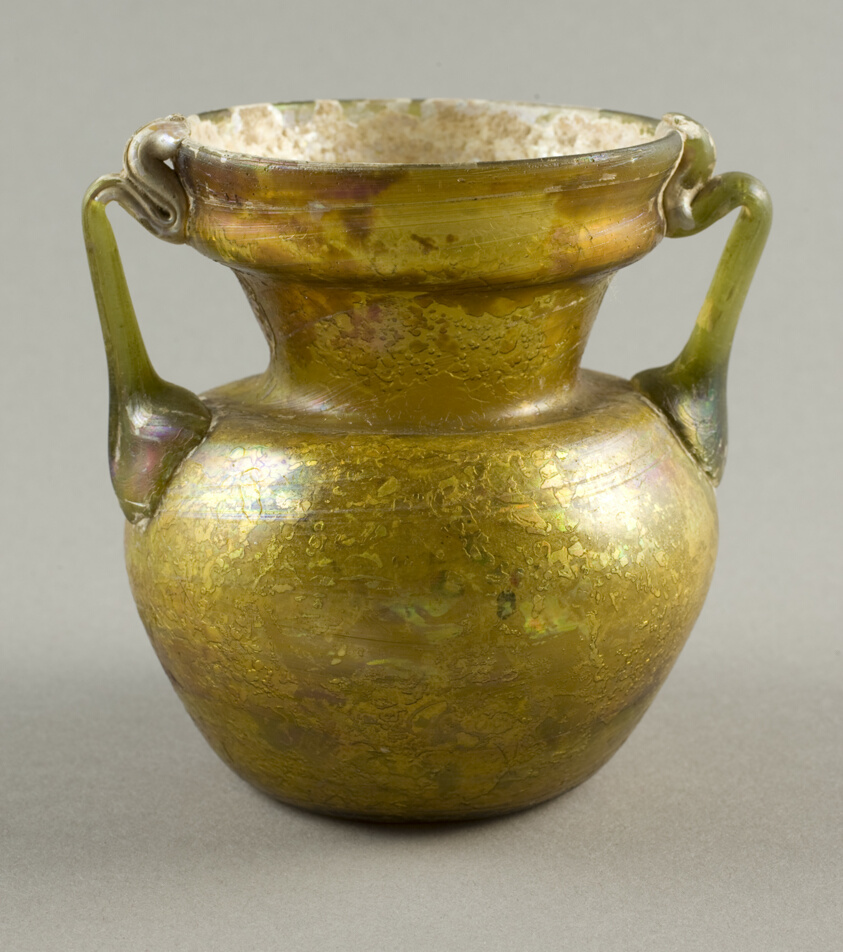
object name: Vessel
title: Jar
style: syrian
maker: Roman; Levant or Syria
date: 3rd-5th century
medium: Glass, blown technique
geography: Syria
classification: vessel; glass; ancient art